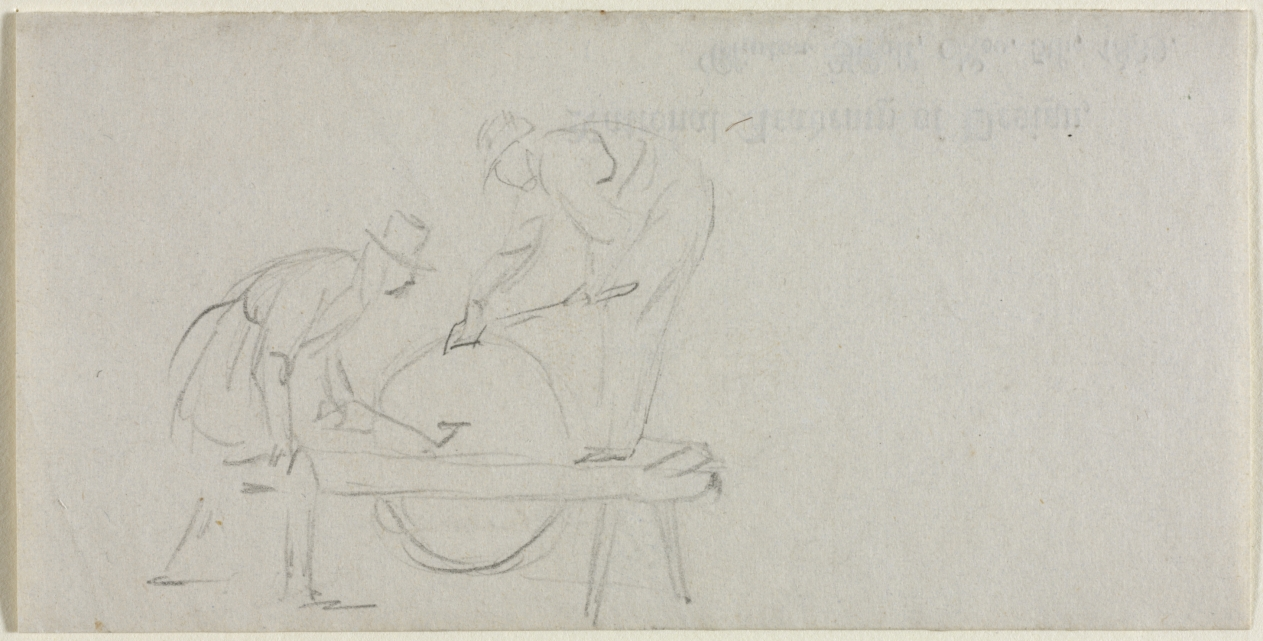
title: Grinding the Axe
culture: America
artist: William Sidney Mount (American, 1807–1868)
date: c. 1827–68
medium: graphite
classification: Drawing